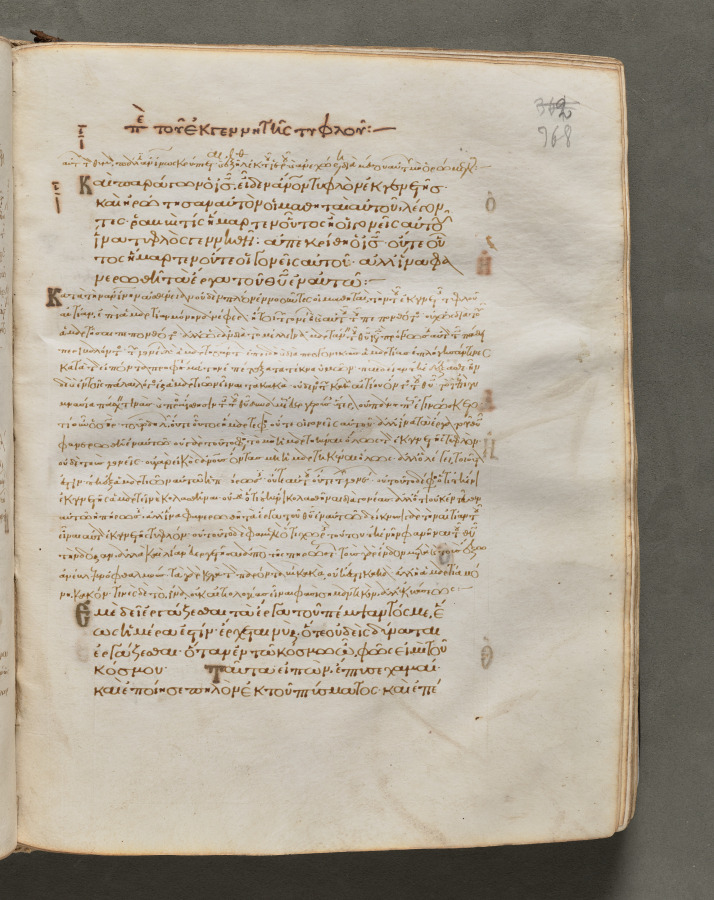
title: Text, folio 368 (recto), from a Gospel Book with Commentaries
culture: Byzantium, Constantinople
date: c. 1000–1100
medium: ink, tempera, and gold on vellum; leather binding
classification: Bound Volume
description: Each of the four gospels in this book opens on a page with brilliantly illuminated borders depicting the author of the text as well as birds—principally peacocks, symbols of the immortality of the soul—and fountains, representing the fountain of life and the salvation of the soul. This volume consists of 428 leaves with texts in Greek. Its level of sophistication suggests that it was probably written and decorated in a monastery in Constantinople.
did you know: Gospel books were carried in procession through Byzantine churches.